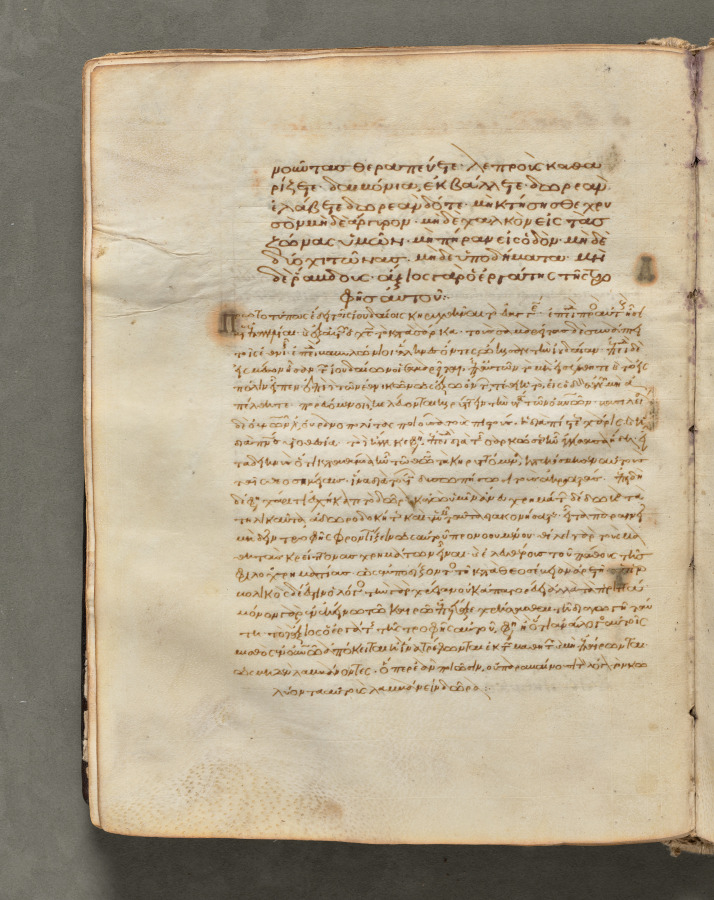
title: Text, folio 42 (verso), from a Gospel Book with Commentaries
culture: Byzantium, Constantinople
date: c. 1000–1100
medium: ink, tempera, and gold on vellum; leather binding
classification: Bound Volume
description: Each of the four gospels in this book opens on a page with brilliantly illuminated borders depicting the author of the text as well as birds-principally peacocks, symbols of the immortality of the soul-and fountains, representing the fountain of life and the salvation of the soul. This volume consists of 428 leaves with texts in Greek. Its level of sophistication suggests that it was probably written and decorated in a monastery in Constantinople.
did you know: Gospel Books were carried in procession through Byzantine churches.